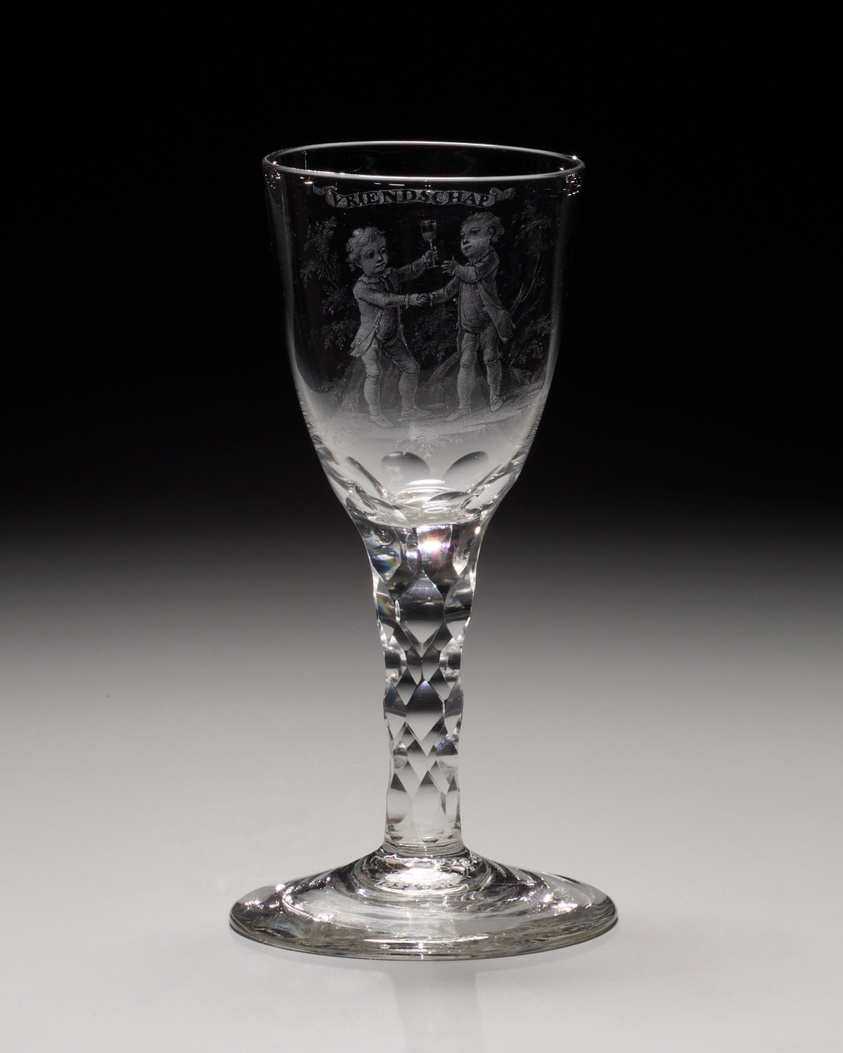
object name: Glass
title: Wine Glass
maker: England or Netherlands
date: c. 1760/80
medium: Glass; cut and stipple engraved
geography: England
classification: drinking vessel; glass; european decorative arts